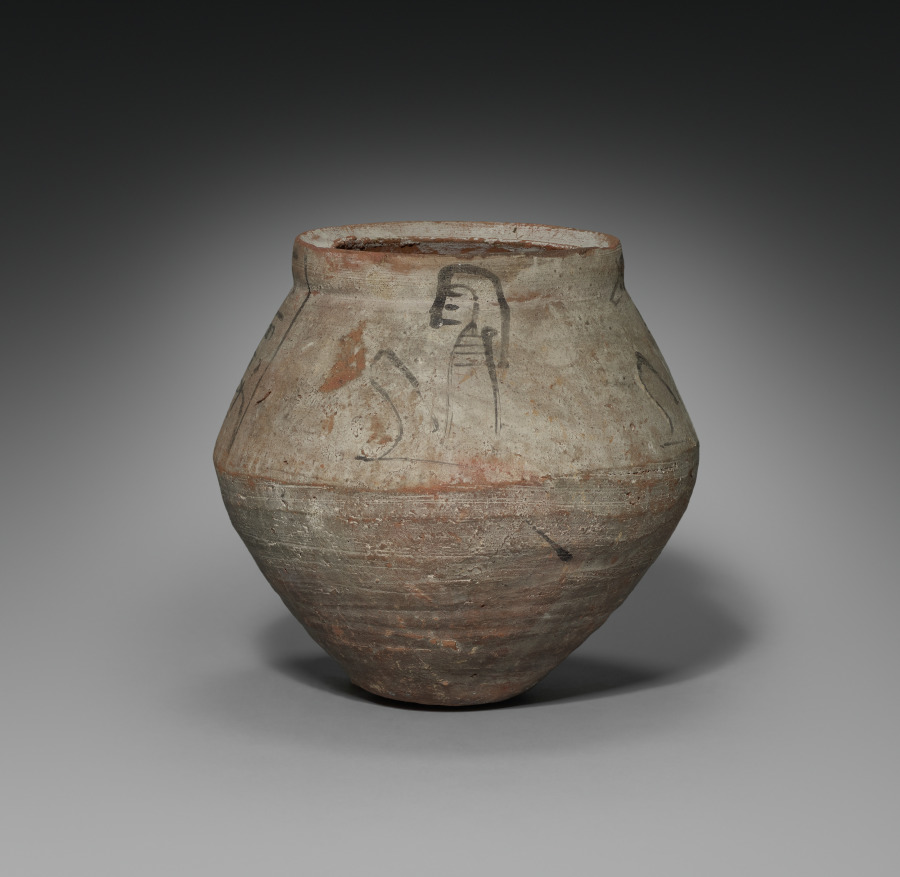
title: Shawabty Jar with Lid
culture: Egypt, New Kingdom (1540–1069 BCE), Dynasties 19–20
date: 1295–1069 BCE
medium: Nile silt ware; lid of limestone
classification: Funerary Equipment